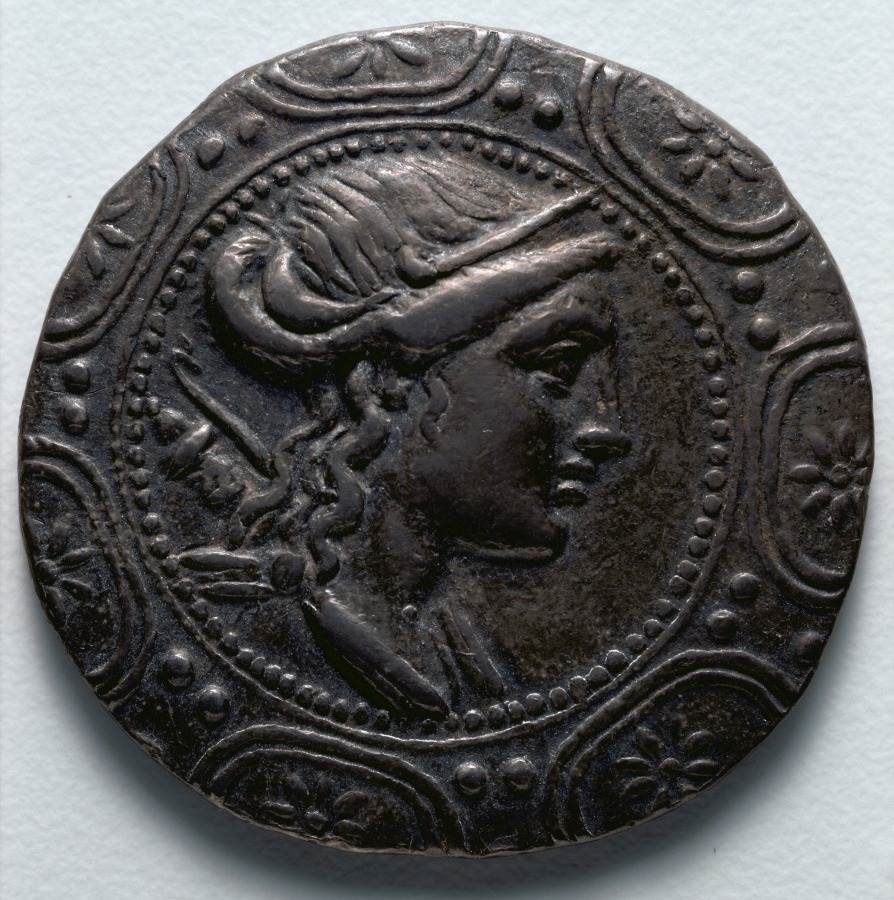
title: Tetradrachm: Macedonian Shield with Head of Artemis (obverse); Club (reverse)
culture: Greek, Macedonian, minted at Amphipolis (Macedonia), under Roman control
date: 158–150 BCE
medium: silver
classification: Coins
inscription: ΜΑΚΕΔΟΝΩΝ ΠΡΩΤΗΣ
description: Although Macedon was conquered by Rome in 168 BC, its mints continued to produce Hellenistic-style coinage. The obverse of this coin shows Artemis, identifiable by her bow and quiver, centered within an ornate Macedonian shield. On the reverse, a club is enclosed by a wreath and an inscription ascribing this coin to the first region of the Roman client state.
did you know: Three monograms around the border of the reverse identify officials responsible for producing this coin.